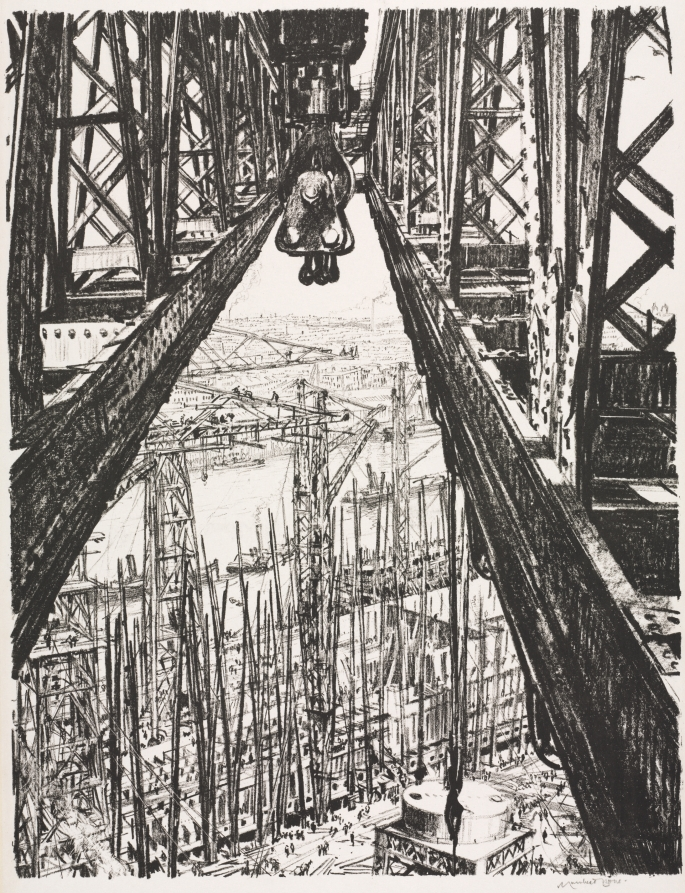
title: The Great War: Britain's Efforts and Ideals; Building Ships: A Shipyard Seen from a Big Crane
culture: England, 20th century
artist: Muirhead Bone (British, 1876–1953)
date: 1917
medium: lithograph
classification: Print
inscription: Signed lower right in pencil: "Muirhead Bone 25%"